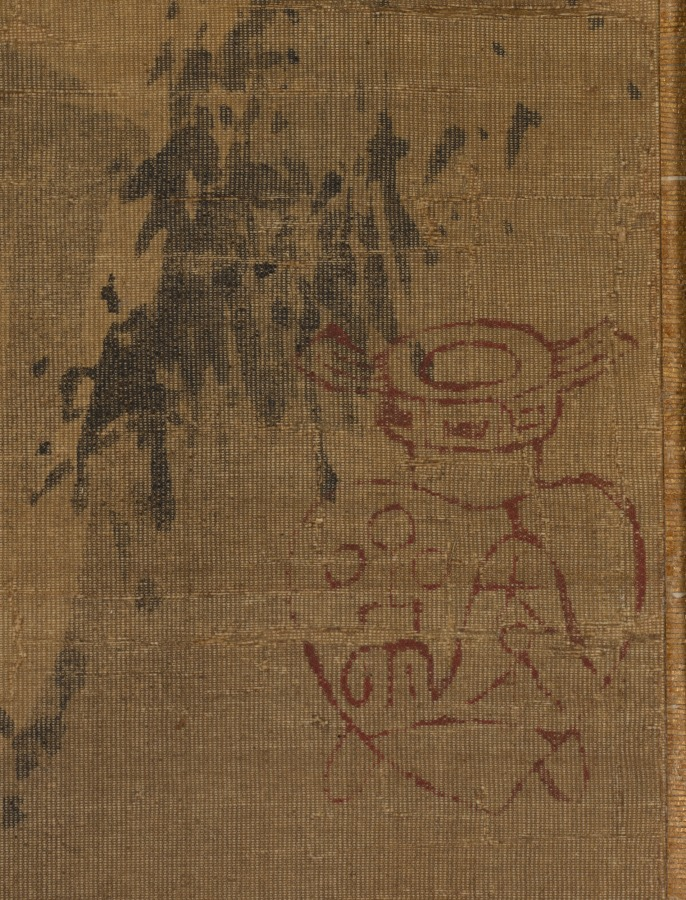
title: Mountain Landscape in Moonlight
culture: China, Southern Song dynasty (1127–1279) to Yuan dynasty (1271–1368)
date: 1200s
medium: hanging scroll; ink on silk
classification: Painting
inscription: 2 unidentified seals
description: Painted in modulated monochrome ink washes with dark dots for foliate accents, the anonymous artist successfully suggests the dense atmosphere of a warm summer night. Under a full moon a scholar rides a mule, accompanied by a servant who carries his belongings. The poem inscribed by Chan (Zen) priest Yunfeng Miaogao identifies the figure as the Tang dynasty poet Du Fu 杜甫 (712–770). Who rides Du [Fu]'s mule: Through the universe his name resounds. Chanting poems as he rides off on his mule, How quickly does he become drunk with Heaven and Earth!